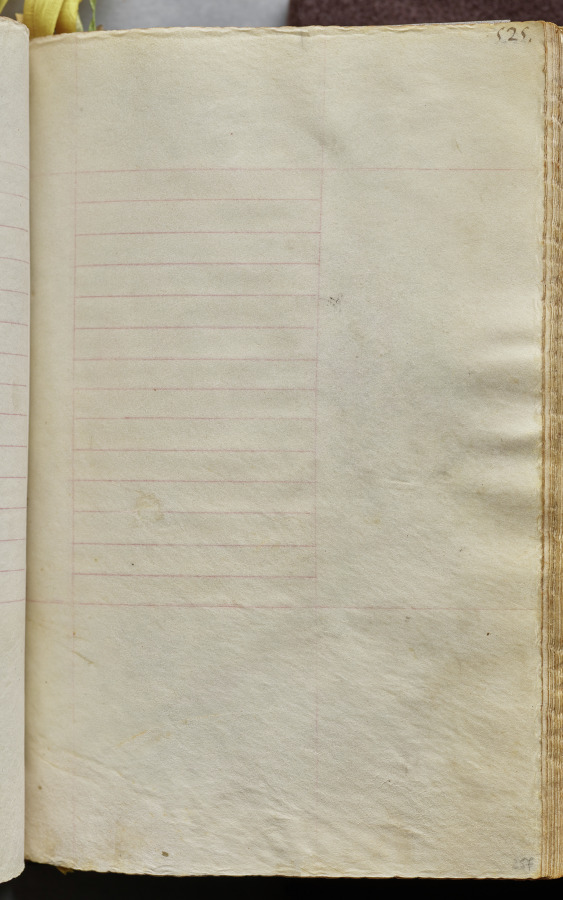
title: Hours of Charles the Noble, King of Navarre (1361-1425): fol. 257r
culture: France, Paris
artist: Master of the Brussels Initials and Associates (French)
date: c. 1405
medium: ink, tempera, and gold on vellum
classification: Bound Volume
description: This precious volume was obviously highly prized by its owner, the French-born King of Navarre, who had his coat of arms painted on no less than twenty folios. Rather than directly commissioning this manuscript from a specific workshop, it seems that Charles the Noble acquired his book of hours -- perhaps ready-made for the luxury market -- while on a trip to Paris in 1404-05. A collaborative effort, six painting styles are evidenced within the pages of this codex, those of two Italians, two Frenchmen, and two Netherlanders. The painter who was responsible for the planning and decoration of the book, and who produced seventeen of the large miniatures, was a Bolognese artist known as the Master of the Brussels Initials. His principal assistant, responsible for most of the borders, was a Florentine who signed his name "Zecho" da Firenze on folio 208 verso.